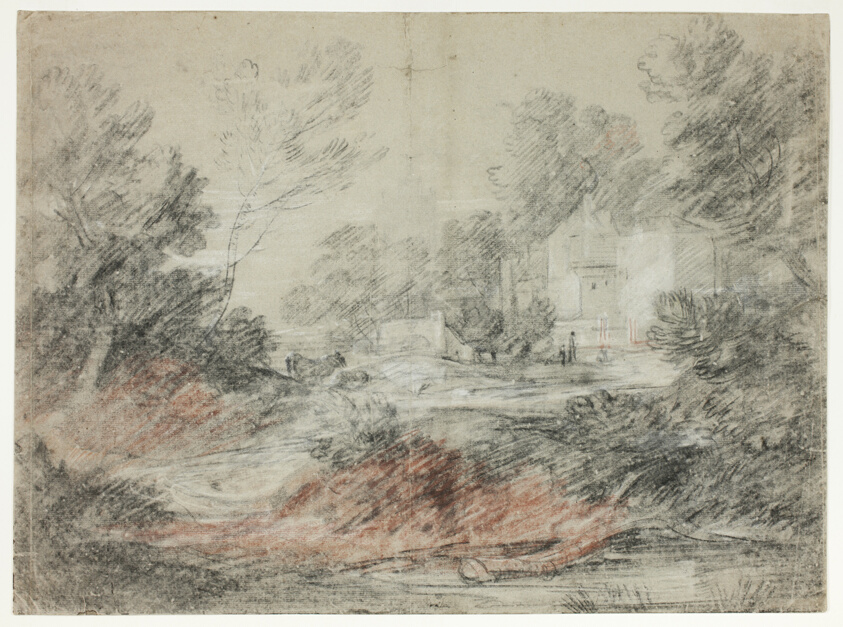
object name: Drawing and Watercolor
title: Landscape with Buildings by a Stream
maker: Attributed to Thomas Gainsborough; English, 1727-1788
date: 1782/86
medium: Charcoal and red chalk, heightened with white chalk, on gray-brown laid paper, laid down on gray-brown laid paper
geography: England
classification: chalk; drawings (visual works); prints and drawing